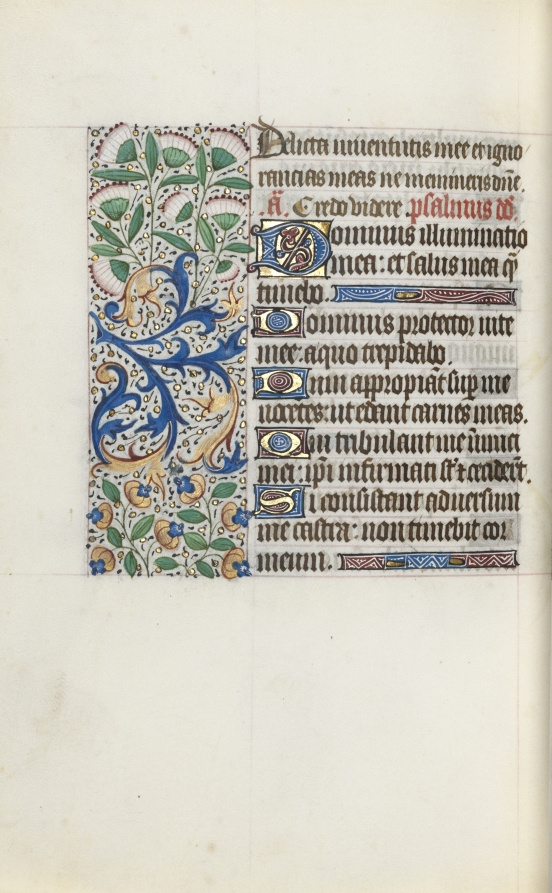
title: Book of Hours (Use of Rouen): fol. 120v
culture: France, Rouen, 15th century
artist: Master of the Geneva Latini (French, active Rouen, 1460–80)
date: c. 1470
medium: ink, tempera, and gold on vellum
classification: Bound Volume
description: In the late 1400s and early 1500s Rouen was an established and important center of book production. The city’s cathedral had a wealthy chapter that spent large sums of money to commission books and to maintain its extensive library. The stationers and booksellers would have likely been concentrated in or near the cathedral precinct. This artist, named after a manuscript now in Geneva, was Rouen’s principal illuminator during the second half of the 1400s.